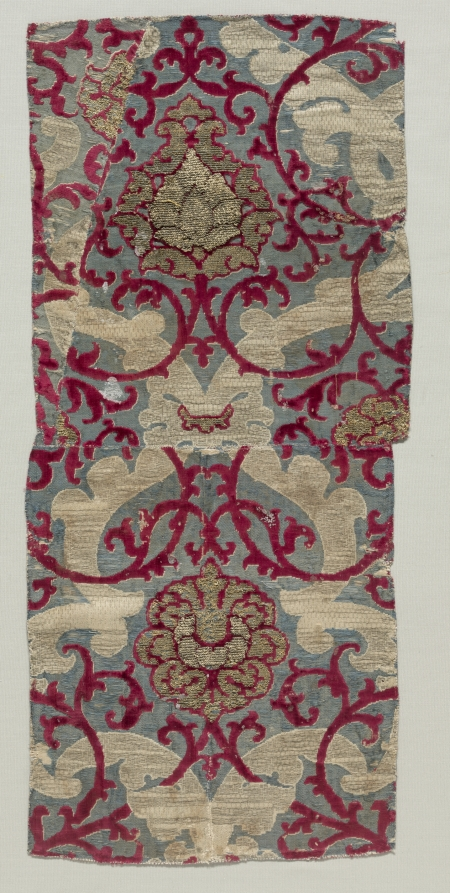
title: Fragment of Velvet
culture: Spain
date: 1400s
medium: velvet (cut, voided, and brocaded); silk and silver-gilt strips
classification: Velvet